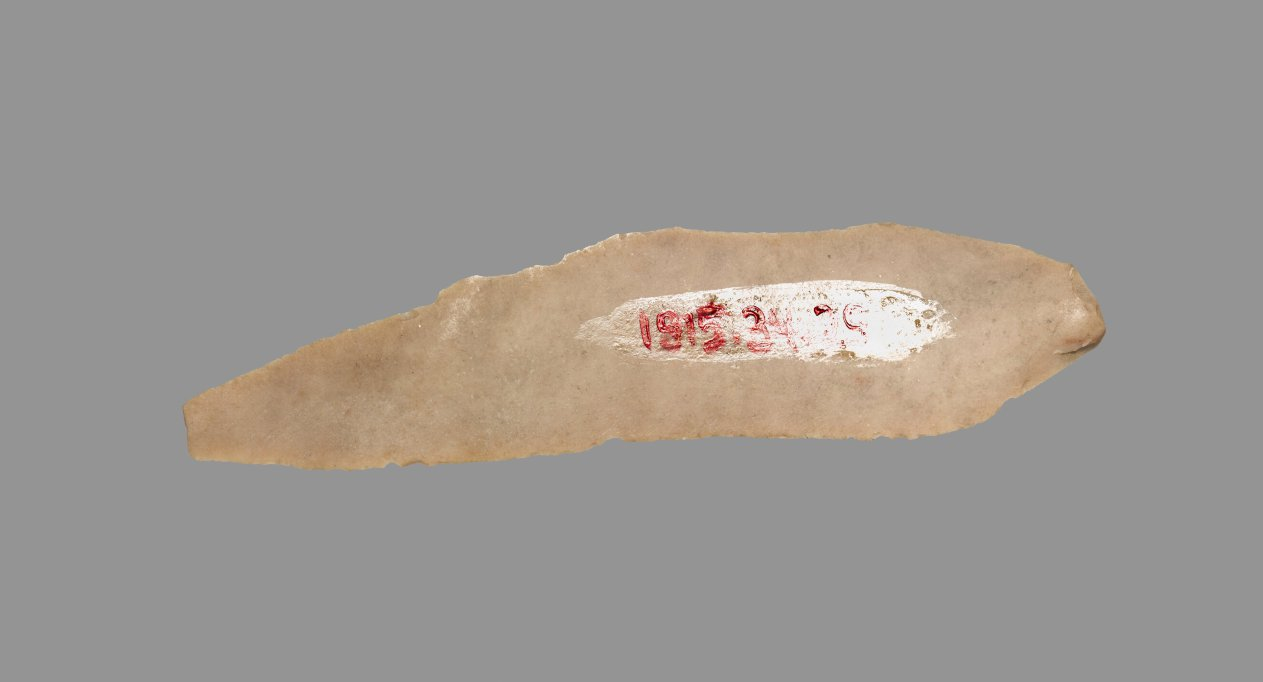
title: Sickle Blade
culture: Egypt, Middle Kingdom (2040–1648 BCE), Dynasty 12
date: 1980–1801 BCE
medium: flint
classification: Implements